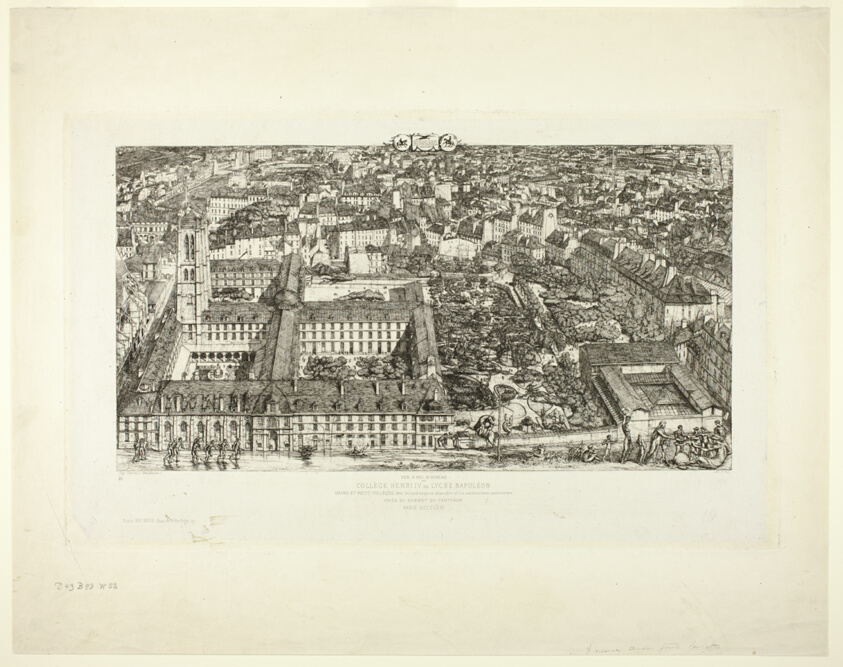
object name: Print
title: Collège Henry IV (or Lycée Napoléon), Paris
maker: Charles Meryon (French, 1821-1868); printed by Pierron (French, 19th century); published by Rochoux (French, 19th century)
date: 1863–64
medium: Etching on grayish ivory wove chine, laid down on ivory laid paper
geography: France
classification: etching; print; prints and drawing